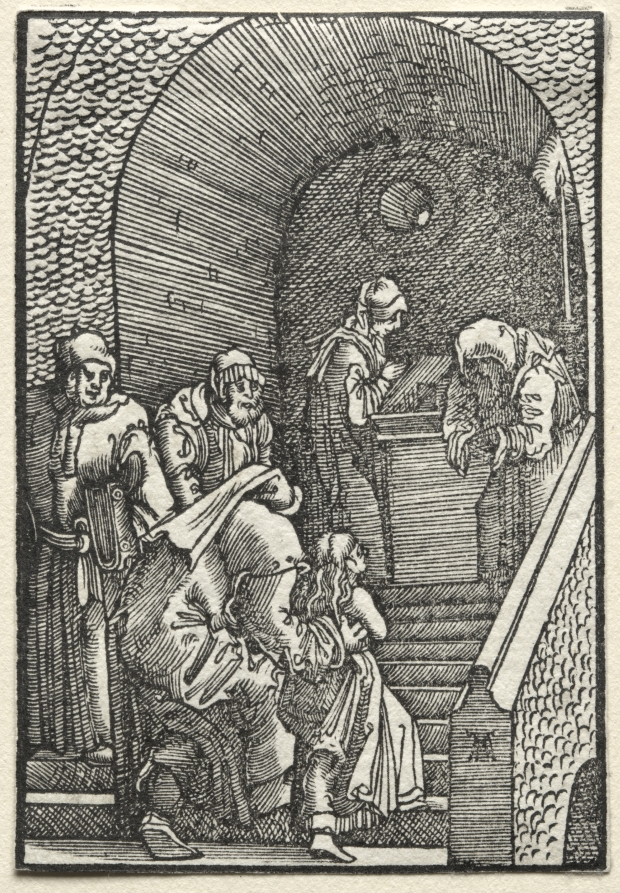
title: The Fall and Redemption of Man: The Presentation of the Virgin in the Temple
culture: Germany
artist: Albrecht Altdorfer (German, c. 1480–1538)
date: 1515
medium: woodcut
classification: Print